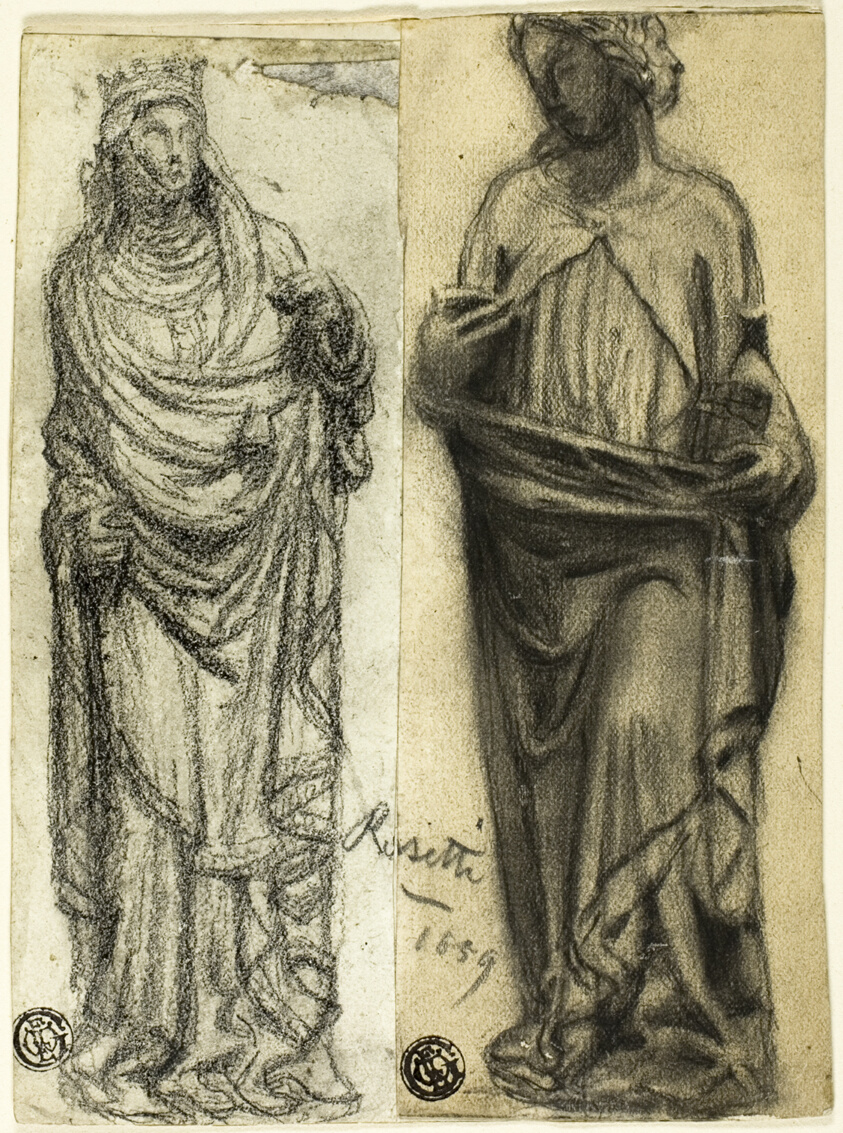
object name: Drawing and Watercolor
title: Two Studies of Medieval Sculpture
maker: Attributed to Dante Gabriel Rossetti; English, 1828-1882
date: 1859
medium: Black chalk with stumping on ivory and buff wove paper, pieced together and laid down on ivory wove paper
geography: England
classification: chalk; drawings (visual works); prints and drawing